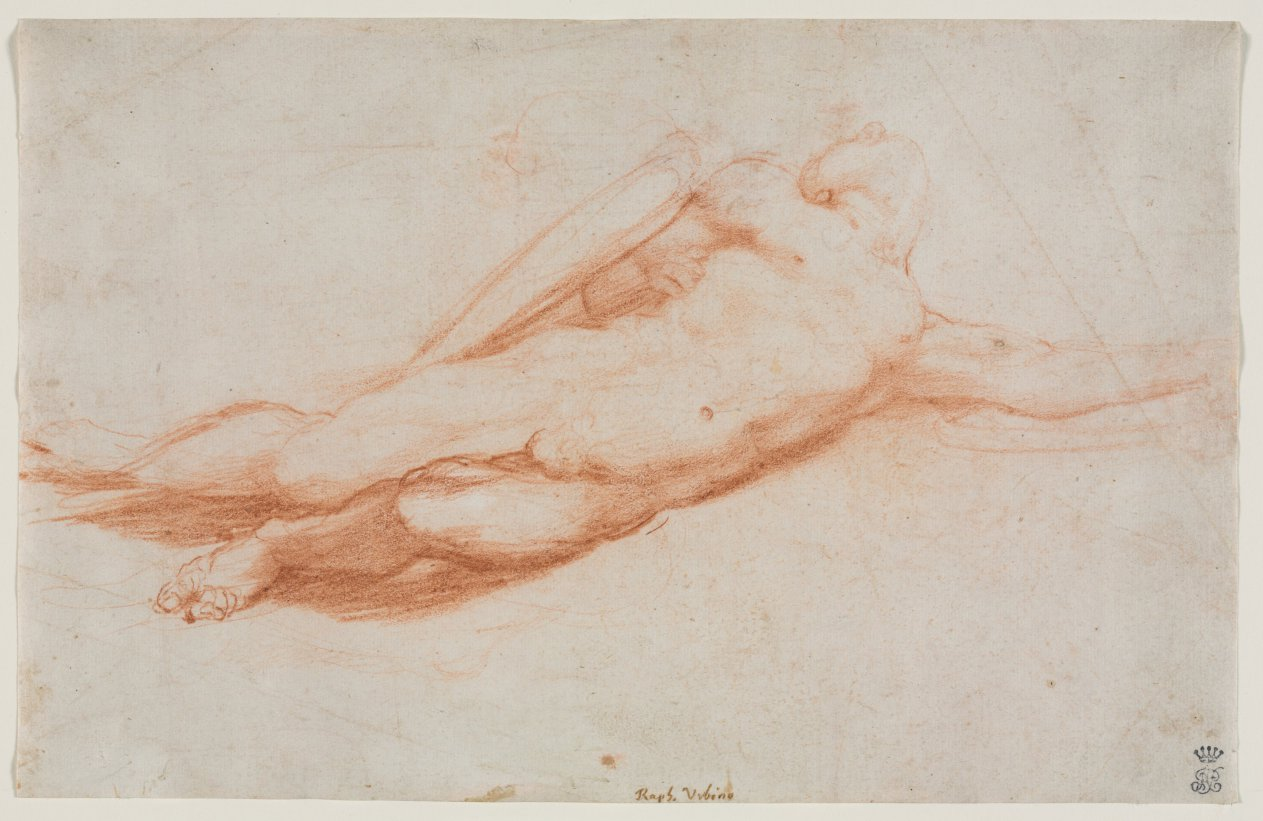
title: Study of a Fallen Soldier (possibly the Conversion of Saul) (recto)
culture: Northern Italy, Emilia, first half 16th Century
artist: attributed to Correggio (Italian, 1489?-1534)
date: c. 1525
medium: red chalk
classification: Drawing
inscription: in brown ink, lower center: Raph. Urbino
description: In this chalk study of a lone, fallen soldier, the brown ink inscription at the bottom of the sheet indicates that at one time it was believed to be by Raphael. However, it is now attributed to Correggio based on the sensuous drawing style that focuses attention on some details, like the soldier’s leg and foot, while other contours are barely sketched and shaded. The back, or verso, of the sheet presents quick sketches of classical-style architecture and a woman with a quiver of arrows on her back; she may be an Amazon, one of a race of warrior women skilled in archery, or Diana, goddess of the hunt.